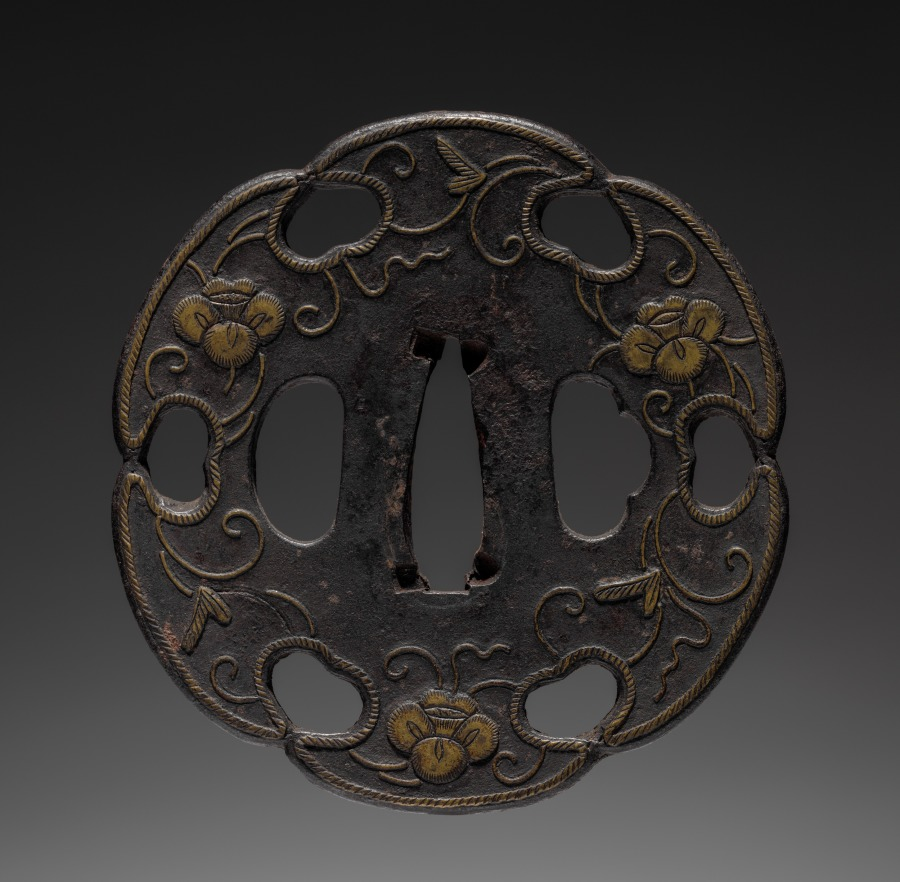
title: Sword Guard (Tsuba)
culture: Japan, possibly Edo period (1615-1868)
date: c. 1615–1868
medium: iron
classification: Arms and Armor